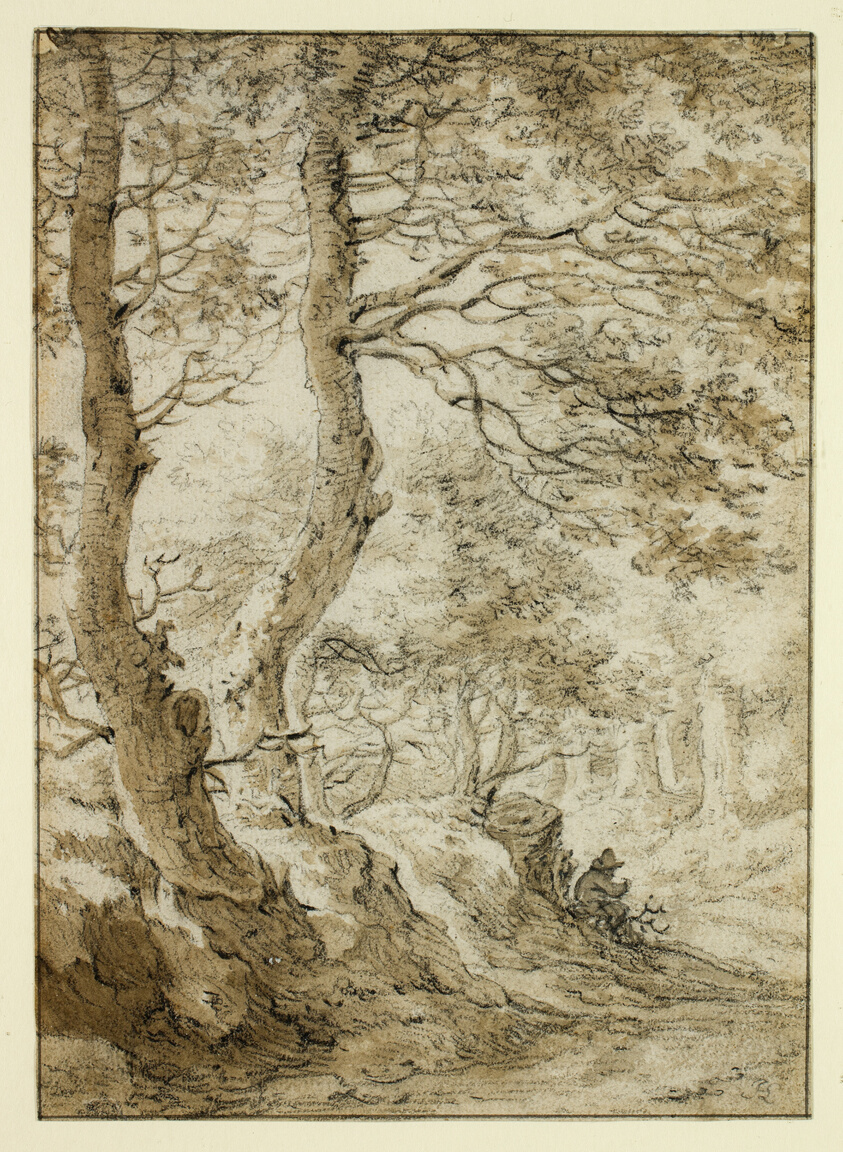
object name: Drawing and Watercolor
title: A Forest Interior, with a Seated Figure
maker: Herman Saftleven (Dutch, 1609-1685)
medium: Black chalk and brush and brown wash, with touches of black crayon and traces of opaque white watercolor, ruled in pen and black ink at edges, on ivory laid paper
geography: Netherlands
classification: chalk; paper; prints and drawing